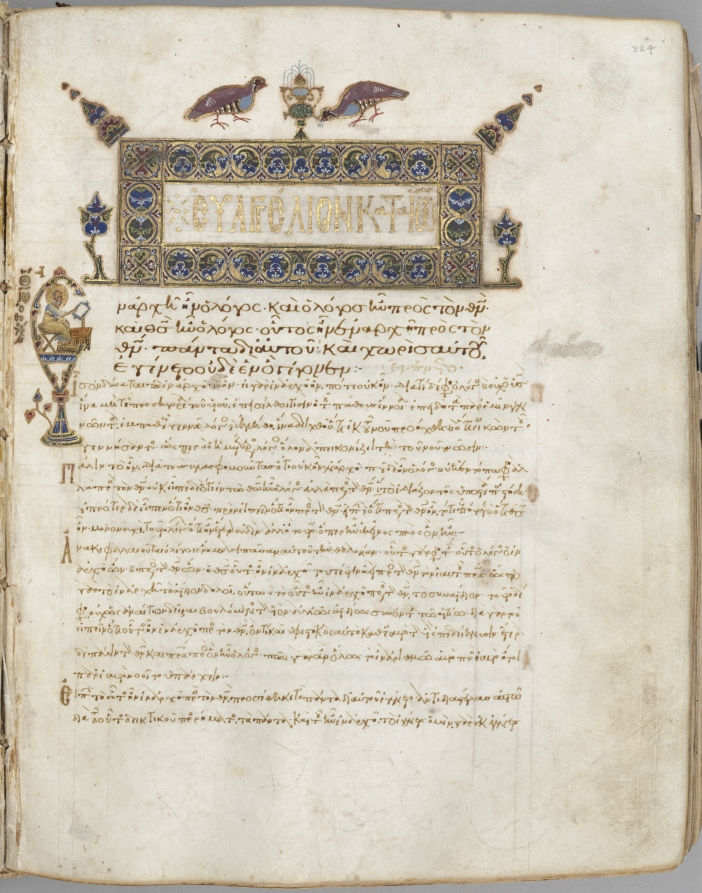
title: Portrait of John, folio 324 (recto), from a Gospel Book with Commentaries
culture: Byzantium, Constantinople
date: c. 1000–1100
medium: ink, tempera, and gold on vellum; leather binding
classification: Bound Volume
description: Each of the four gospels in this book opens on a page with brilliantly illuminated borders depicting the author of the text as well as birds-principally peacocks, symbols of the immortality of the soul-and fountains, representing the fountain of life and the salvation of the soul. This volume consists of 428 leaves with texts in Greek. Its level of sophistication suggests that it was probably written and decorated in a monastery in Constantinople.